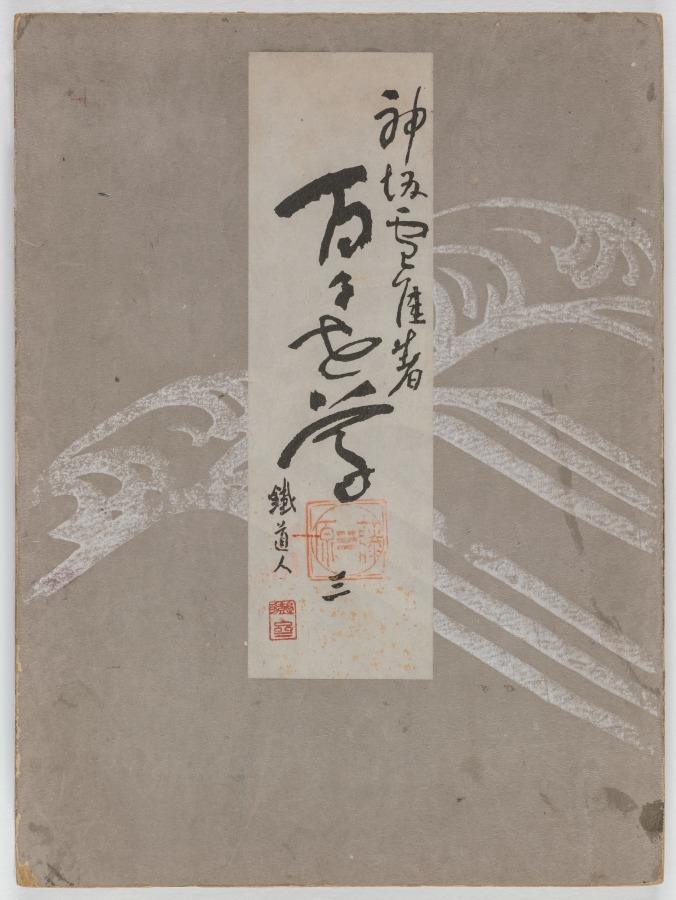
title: Flowers of a Hundred Worlds (Momoyogusa), Vol. 3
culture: Japan, Meiji period (1868–1912)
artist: Kamisaka Sekka (Japanese, 1866–1942)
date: 1909–10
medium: one of a set of three woodblock printed folding-books; ink, color, gold, and silver on paper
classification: Bound Volume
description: This volume from a set of three woodblock printed albums displays the graphic design prowess of Kamisaka Sekka. The images were first distributed one by one to subscribers to the series but later were reissued in bound form, like this book, for mass consumers. Each print features a vignette taken from nature or Japanese literature. Many of the scenes have a long history in Japan, originating in the 900s or 1000s and having been interpreted by all manner of artists since that time. Sekka’s selections hew closely to precedents from the Rinpa style originated by painter Tawaraya Sōtatsu (c. 1570–c. 1640) and calligrapher Hon’ami Kōetsu (1558–1637).